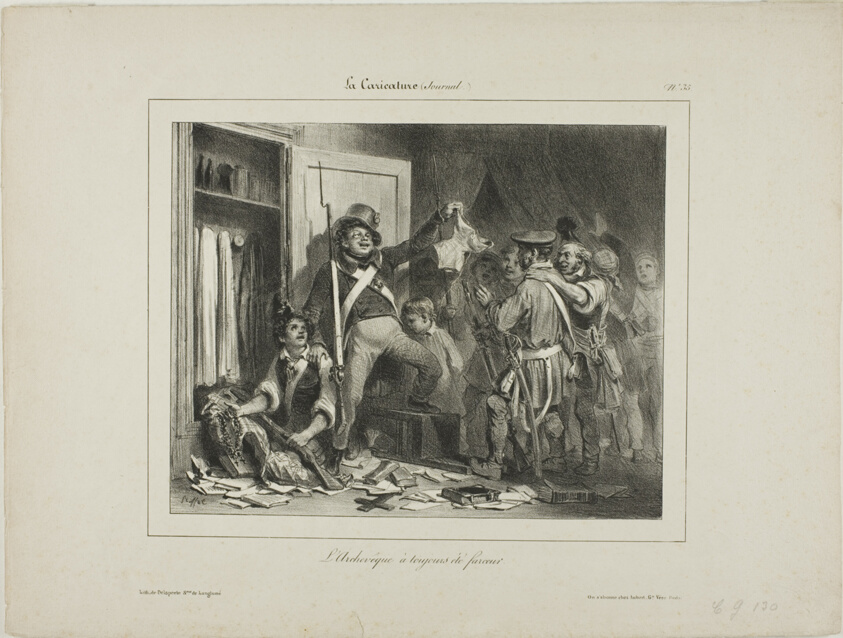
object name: Print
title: The Archbishop Was Always a Rogue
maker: Denis Auguste Marie Raffet (French, 1804-1860); published by Chez Aubert (French, 19th century); printed by Delaporte (French, 19th century)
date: 1831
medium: Lithograph in black on buff wove paper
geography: France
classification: lithograph; print; prints and drawing